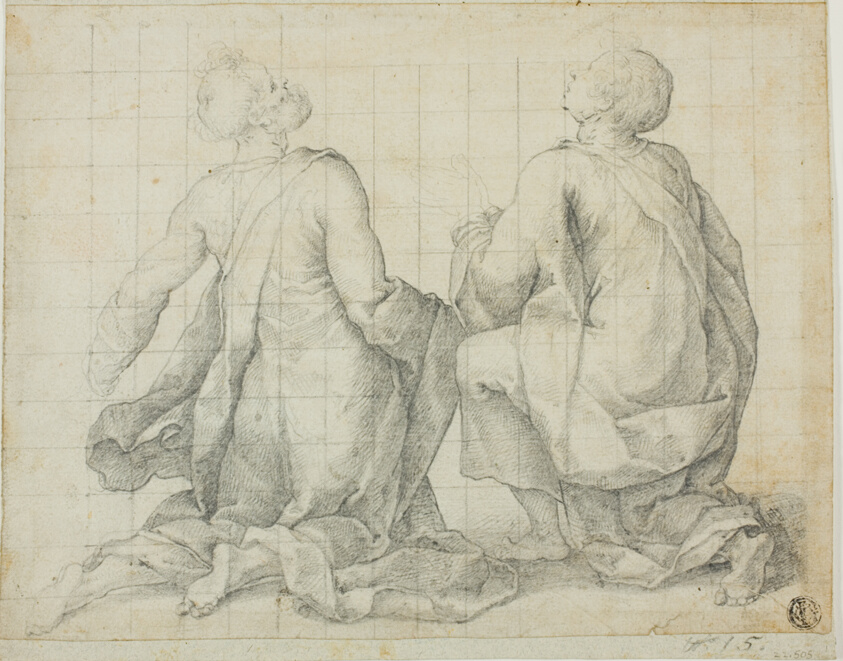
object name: Drawing and Watercolor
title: Two Kneeling Male Saints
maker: Unknown Cremonese (Late 16th century)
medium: Graphite on ivory laid paper, squared in graphite, laid down on blue laid paper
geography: Italy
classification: graphite; drawings (visual works); prints and drawing